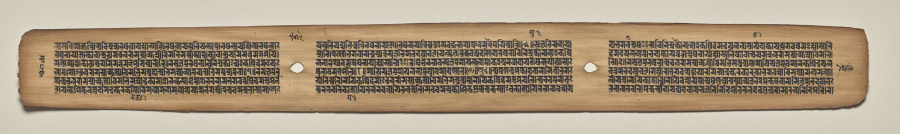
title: Text, folio 159 (verso), from a Manuscript of the Perfection of Wisdom in Eight Thousand Lines (Ashtasahasrika Prajnaparamita-sutra)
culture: Eastern India, Bihar, Vikramashila Monastery. Painting: Nepal, Kathmandu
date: Sunday, September 14, 1119 (year 239 of the Newar Samvat in the month of Ashvina)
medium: gum tempera and ink on palm leaves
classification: Painting